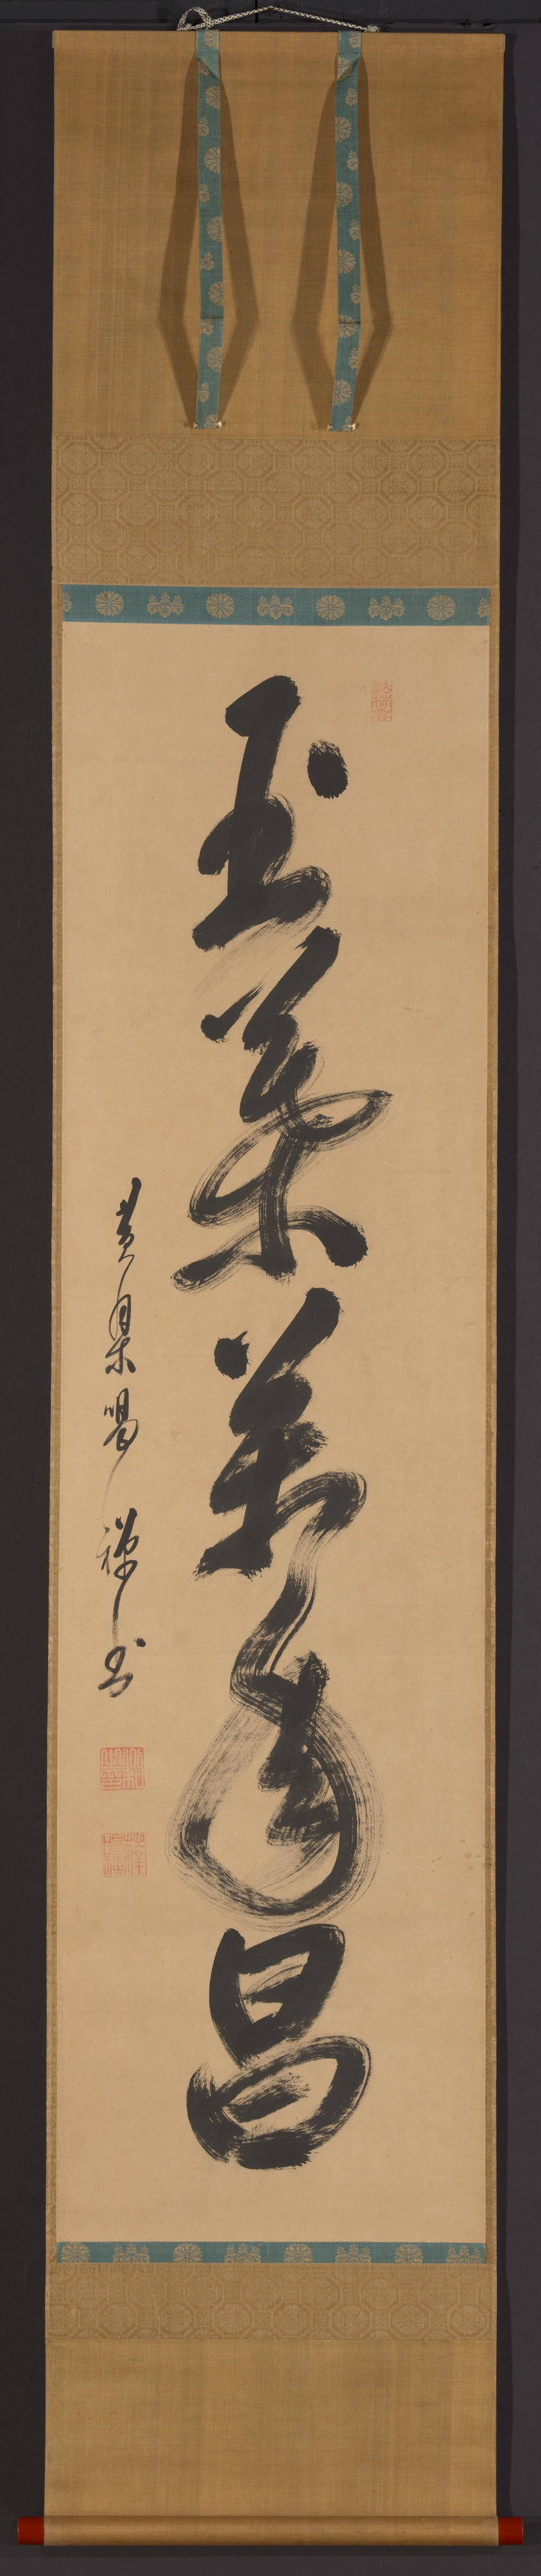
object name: Painting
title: Triptych of Calligraphy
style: edo (japanese period), Japanism, East Asian, asian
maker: Katsuzen Dowa; Japanese, 1634-1707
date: Late 17th– early 18th century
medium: Set of three hanging scrolls; ink on paper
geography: Japan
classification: hanging scroll; painting; asian art